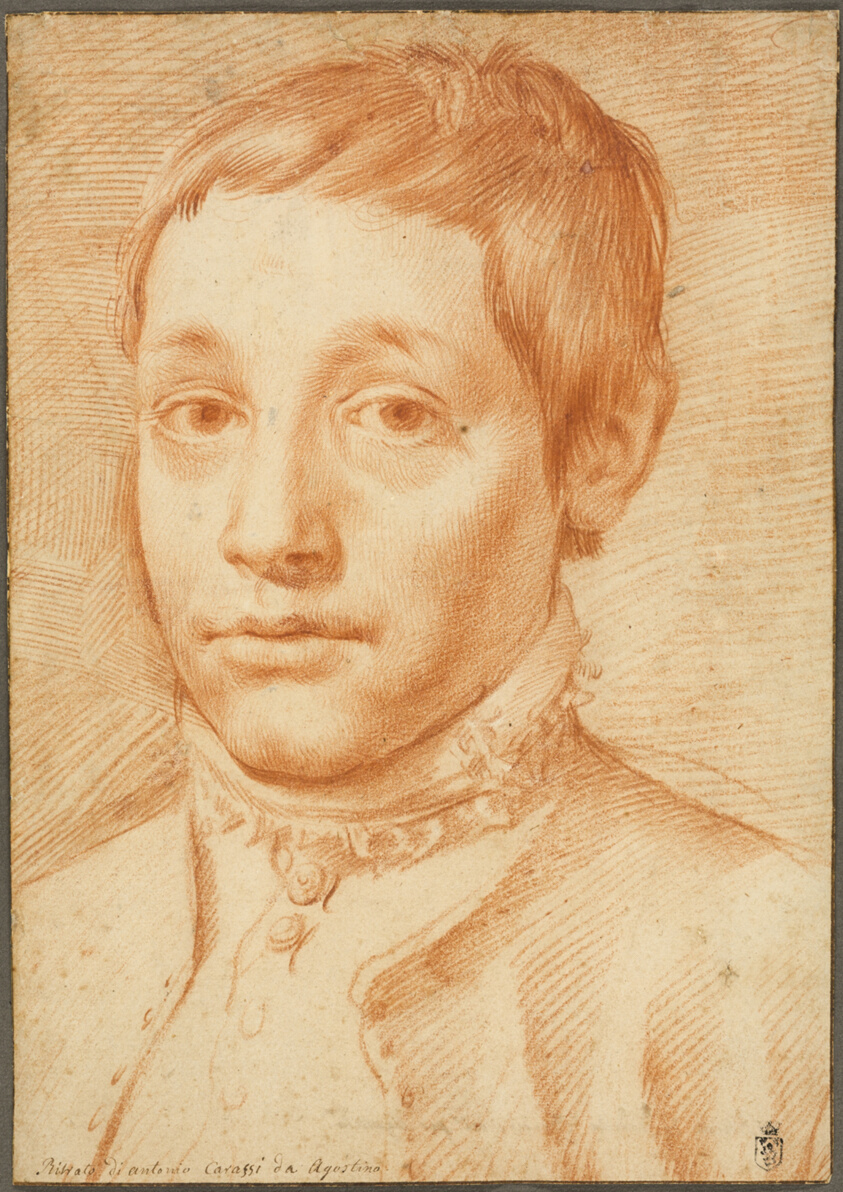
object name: Drawing and Watercolor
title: Portrait of the Artist's Son, Antonio Carracci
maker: Agostino Carracci (Italian, 1557-1602)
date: 1592/95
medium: Red chalk on cream laid paper, laid down on cream wove paper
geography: Italy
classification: chalk; drawings (visual works); prints and drawing